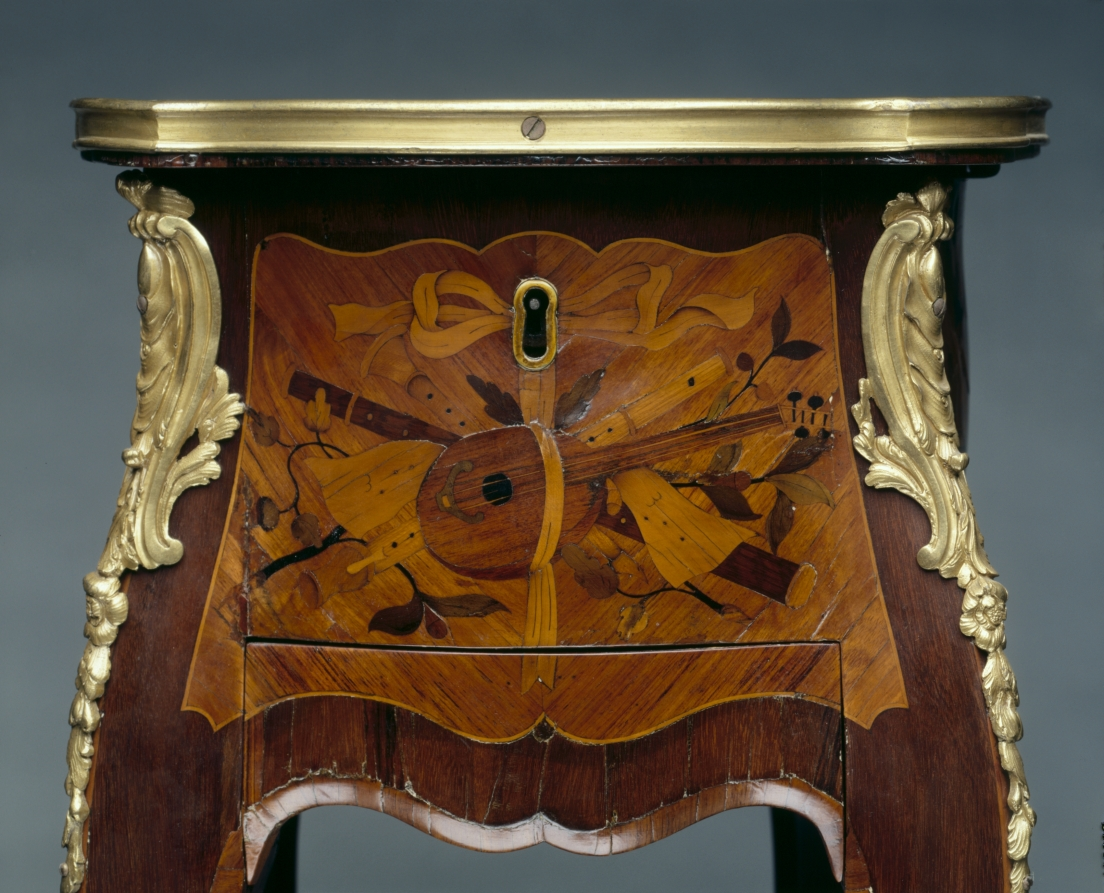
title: Work Table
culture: France, Paris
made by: Bernard Peridiez (French, d. 1757)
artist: or Gerard Peridiez (French, born c.1730)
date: 1700–1799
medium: wood marquetry with gilt bronze mounts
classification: Furniture and woodwork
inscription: signed under shelf: B. Peridiez JNE.